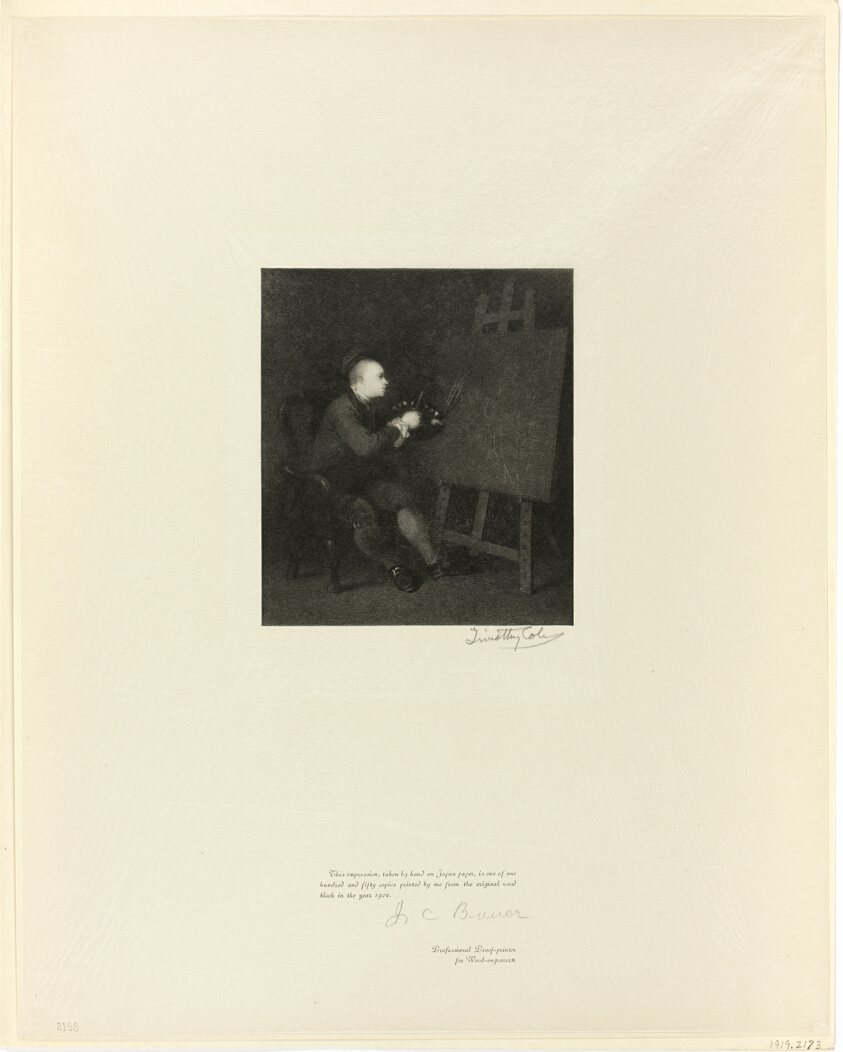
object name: Print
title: Portrait of William Hogarth, from Old English Masters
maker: Timothy Cole (American, born England, 1852-1931); after William Hogarth (English, 1697-1764)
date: 1897, printed 1902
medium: Wood engraving on chine paper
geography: United States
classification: wood engraving; print; prints and drawing